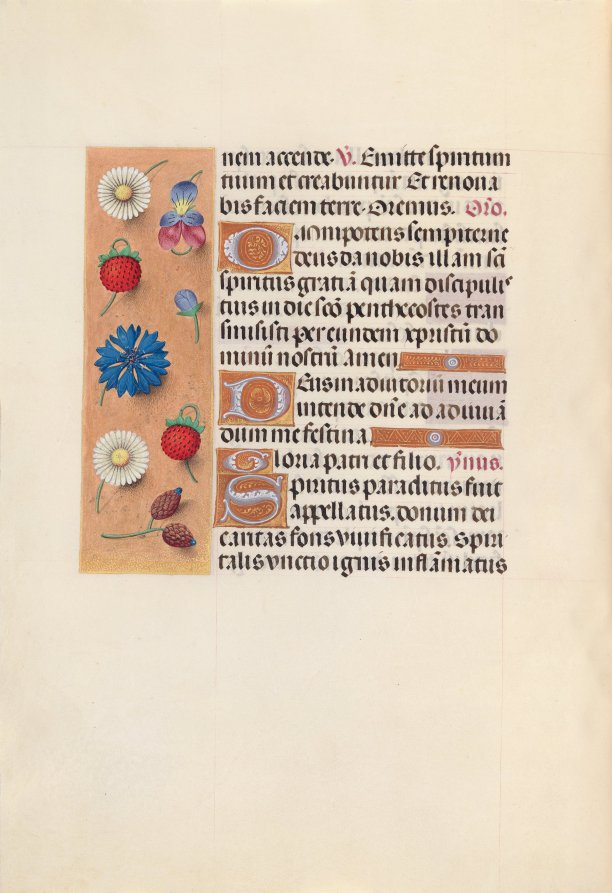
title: Hours of Queen Isabella the Catholic, Queen of Spain: Fol. 34v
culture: Flanders, Ghent and Bruges, late 15th century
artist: Master of the First Prayerbook of Maximillian (Flemish, c. 1444–1519)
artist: and Associates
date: c. 1500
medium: ink, tempera, and gold on vellum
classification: Bound Volume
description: This manuscript was illuminated by a circle of at least five highly organized manuscript painters active in the Flemish cities of Ghent and Bruges. The principal illuminator was Alexander Bening, who painted the majority of the book's miniatures. Manuscripts produced by this circle of artists are renowned for the decoration of their borders, which typically feature a rich variety of realistically-painted flowers, birds, and butterflies. This prayer book, called a book of hours, was intended not for a cleric, but for the private devotions of a lay person-in this case, Isabella the Catholic, Queen of Spain (1451-1504). Isabella's coat of arms embellishes the book's frontispiece. It is unlikely that the book was commissioned by the Queen herself; rather, she probably received it as a diplomatic gift from someone courting her patronage, perhaps Cardinal Francisco Jimenez de Cisneros. A Franciscan friar, Jimenez was dependent upon Isabella for his advancement, first to the post of Queen's confessor in 1492, and then to Archbishop of Toledo in 1495.